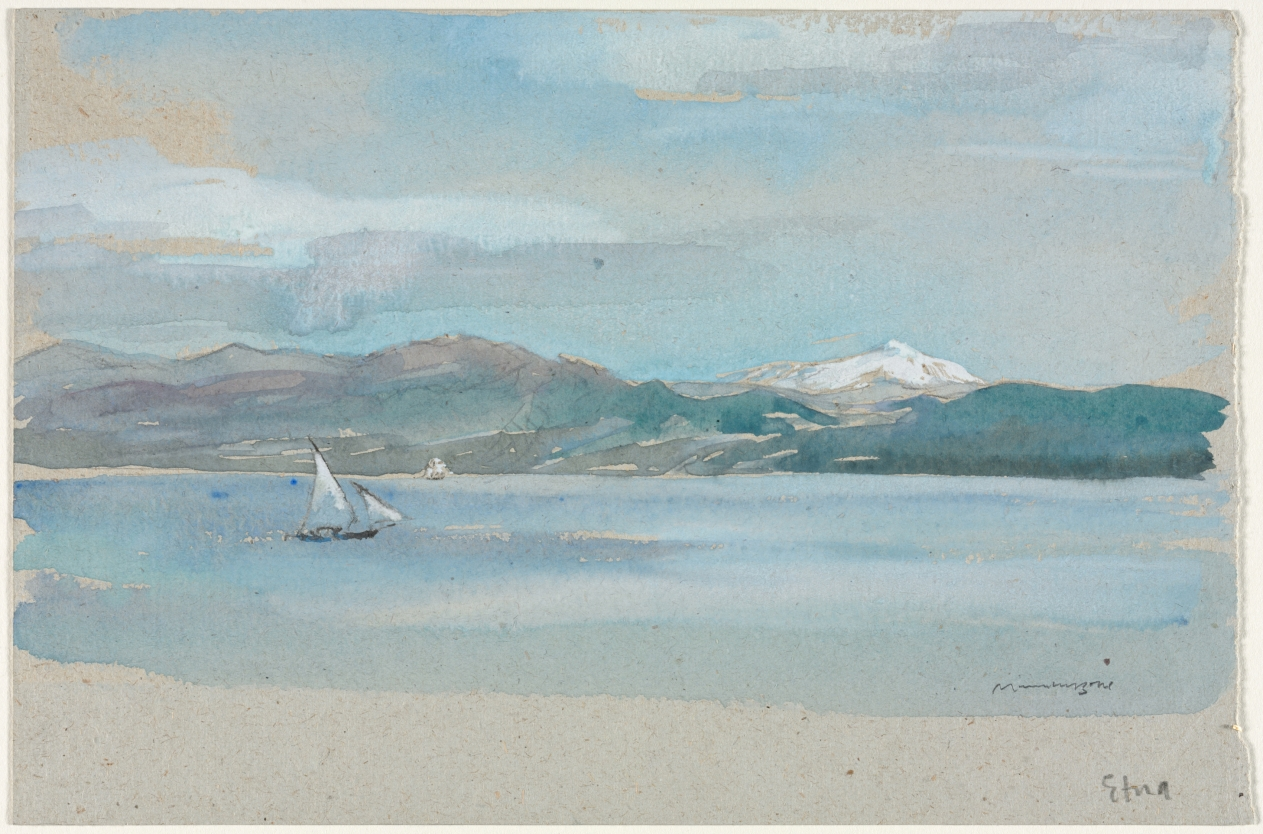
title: Etna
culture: England, 20th century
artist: Muirhead Bone (British, 1876–1953)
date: c. 1896–1953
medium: watercolor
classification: Drawing